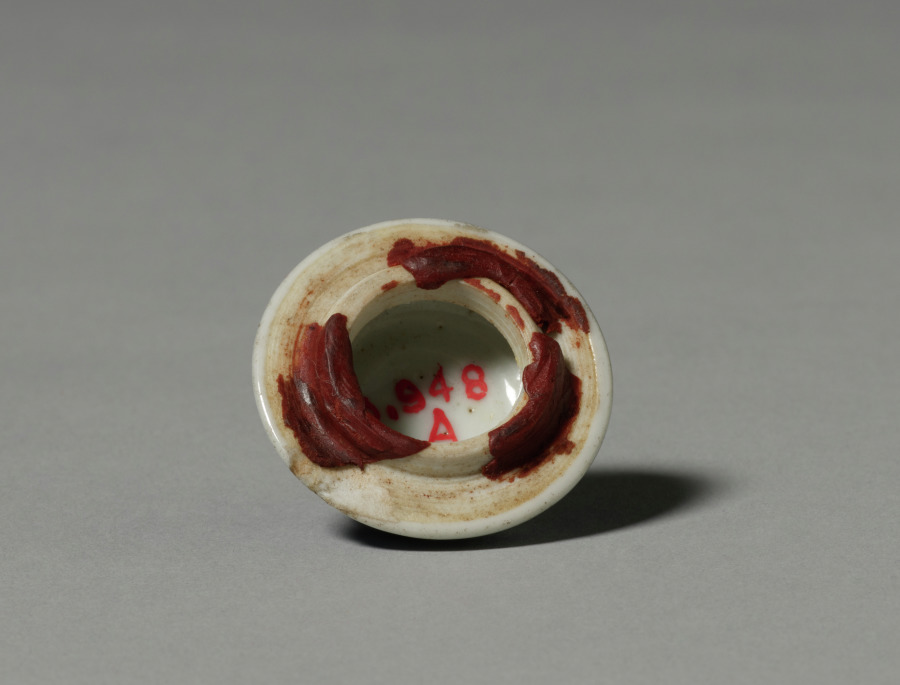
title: Jar with Cover (lid)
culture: China, Qing dynasty (1644-1911)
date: 19th Century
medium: porcelain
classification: Ceramic